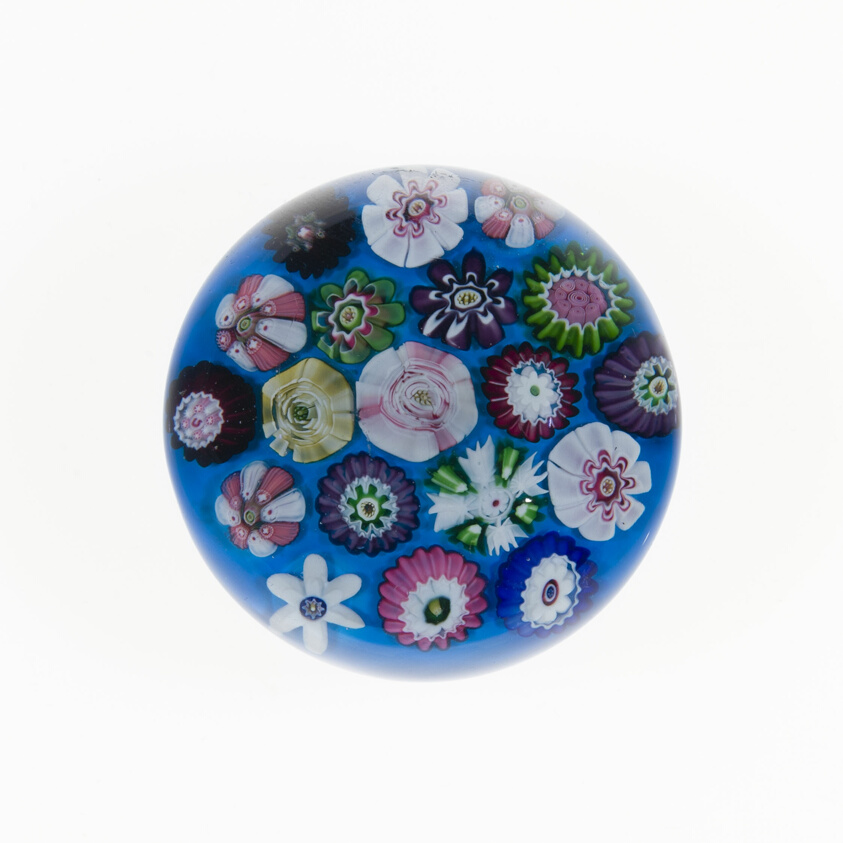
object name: Glass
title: Paperweight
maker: Clichy Glassworks (Cristalleries de Clichy); Clichy, France, 1837-1885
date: 19th century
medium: Glass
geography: Clichy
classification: paperweight; millefiori; european decorative arts; glass